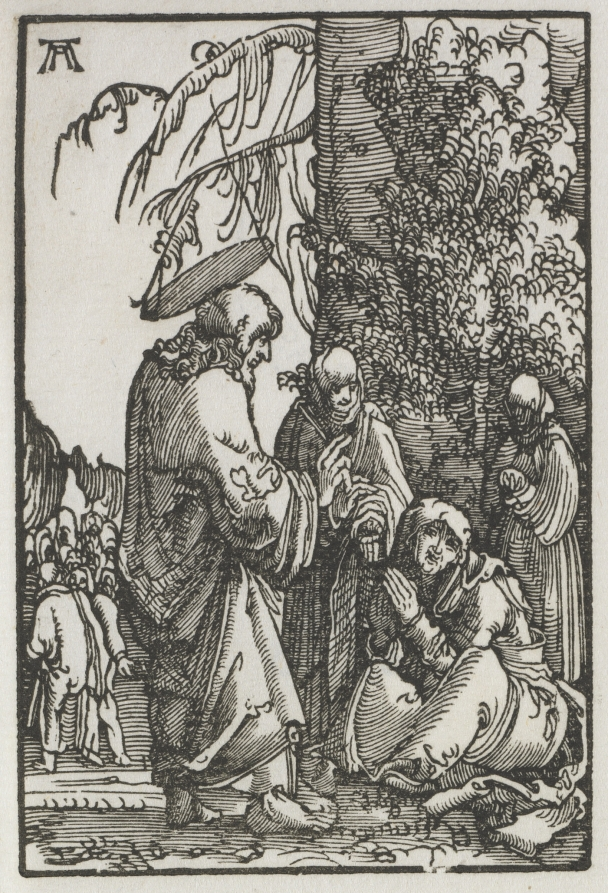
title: The Fall and Redemption of Man: Christ Taking Leave of His Mother before the Passion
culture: Germany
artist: Albrecht Altdorfer (German, c. 1480–1538)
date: c. 1515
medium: woodcut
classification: Print